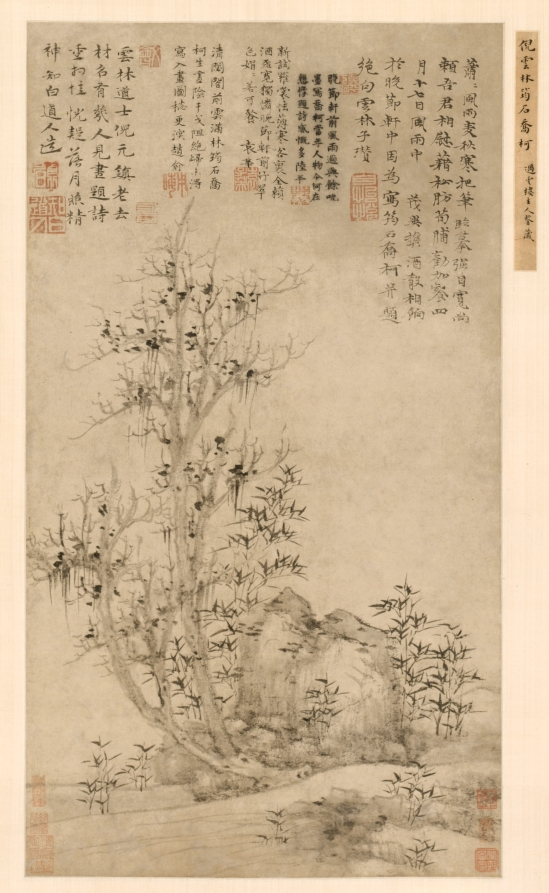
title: Bamboo, Rock, and Tall Tree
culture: China, Yuan dynasty (1271–1368)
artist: Ni Zan (Chinese, 1301–1374)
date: c. 1300s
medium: hanging scroll; ink on paper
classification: Painting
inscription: Artist's inscription, signature, and seal: Windy and rainy days - what a chilly wheat-harvesting season,/ With brush in hand, I fight depression by copying./ Fortunately, I can depend upon you, my friend, to send me consolation -/ "Pine-lard" wind, and meat with bamboo shoots that never fail to awaken appetite./ Yunlinzi, Zan. [seal] Ziyiyue.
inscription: 4 additional inscriptions and 14 additional seals: 1 poem and 3 seals, possibly of Chang Yü (1277–1350); 1 poem and 1 seal of Yüan Hua (1316–end of 14th c,); 1 poem and 2 seals of Lu P'ing (1438–1521); 1 seal of Liang Qingbiao 梁清標 (1620–1691); 1 poem and 1 seal of Chao Yü (1638–1713); 1 seal of ? Jen-lan (dates unknown); 2 seals of Gu Wenbin 顧文彬 (1811–1889); 1 seal of C. C. Wang 王季遷 (1907–2003); 2 seals unidentified.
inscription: Poem possibly by Chang Yü: The Daoist of the Cloudy Forest, Ni Yuanzhen,/ How many people can enjoy a fame in old age like yours?/ Seeing the painting, I wrote the poem in fond memories./ I feel as if I am bathed in the light of the fading moon/ Which shines on your spirit as always.